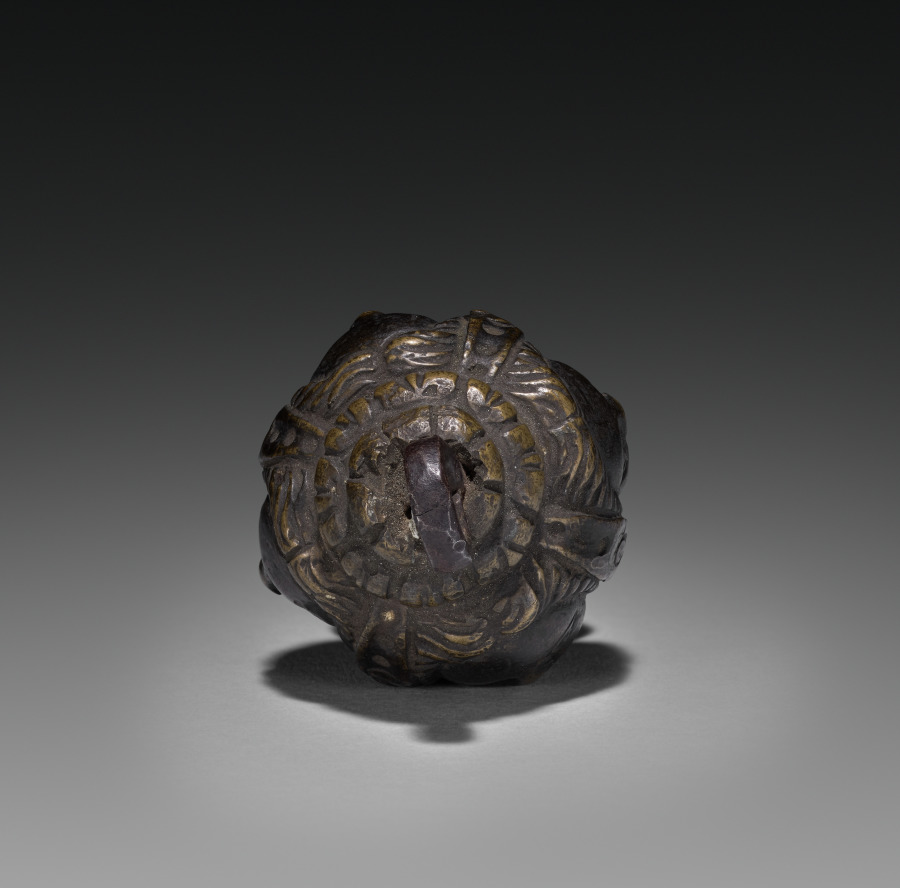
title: Decorative Finial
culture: Italian or French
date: 1800s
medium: brass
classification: Arms and Armor